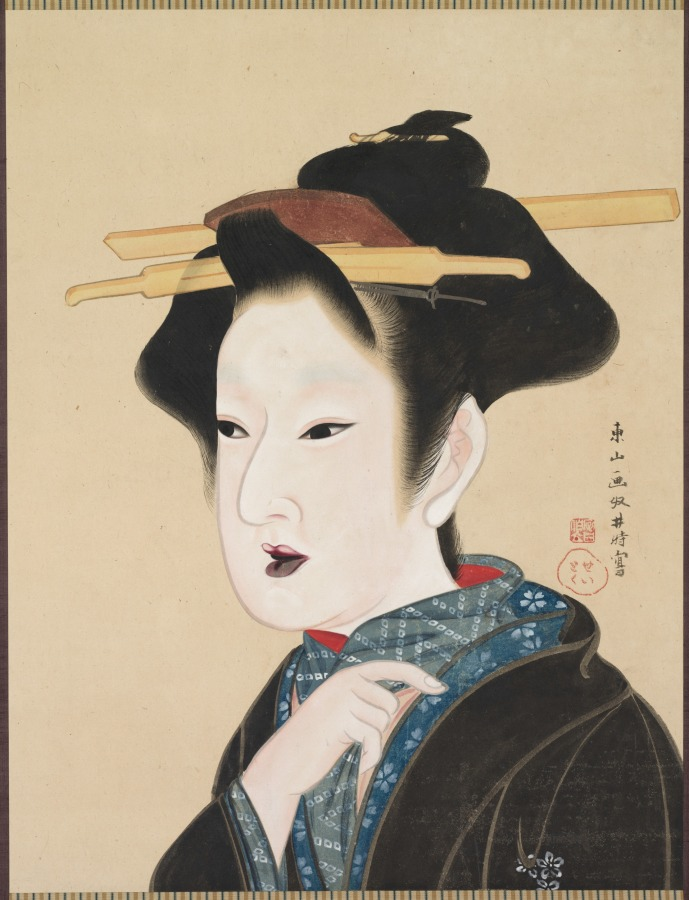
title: A Beauty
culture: Japan, Edo period (1615–1868)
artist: Gion Seitoku (Japanese, active late 1700s–early 1800s)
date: early 1800s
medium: hanging scroll; ink and color on paper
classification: Painting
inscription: 東山画奴井特寫 「字日伯立」白文方印・「せいとく」朱文千鳥印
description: A Kyoto-based ukiyo-e painter, Gion Seitoku specialized in portraying women from Gion and Shimabara, licensed brothel districts in that city. He was known for detailing faces with subtle modeling to heighten a sense of realism. During the 1700s and 1800s, wearing iridescent, greenish lip gloss made from safflower was in vogue. In addition, Japanese women almost universally practiced the custom of artificially blackening their teeth with a stain.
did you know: The person's lipstick is made from safflower.